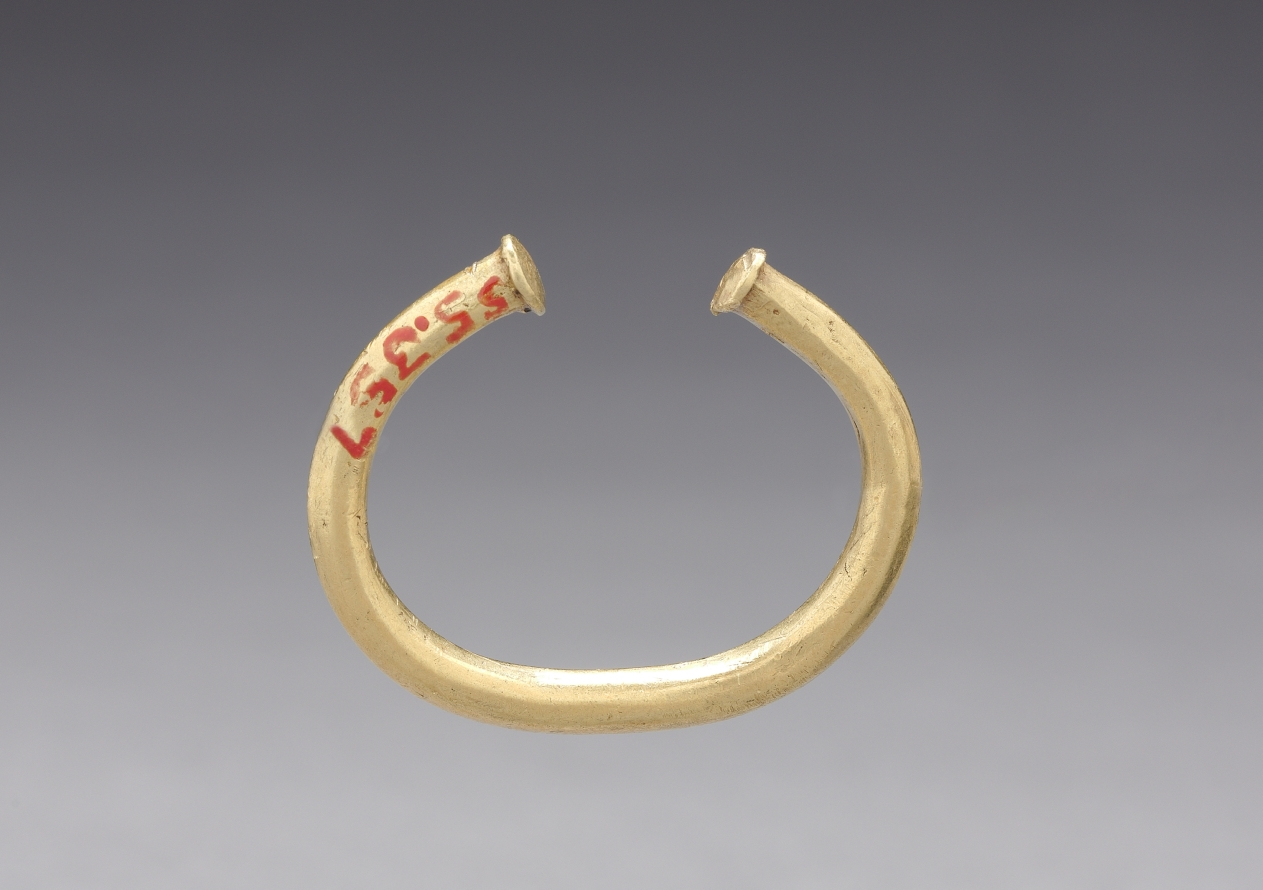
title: Nose Ornament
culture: Colombia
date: before 1550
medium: cast gold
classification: Jewelry